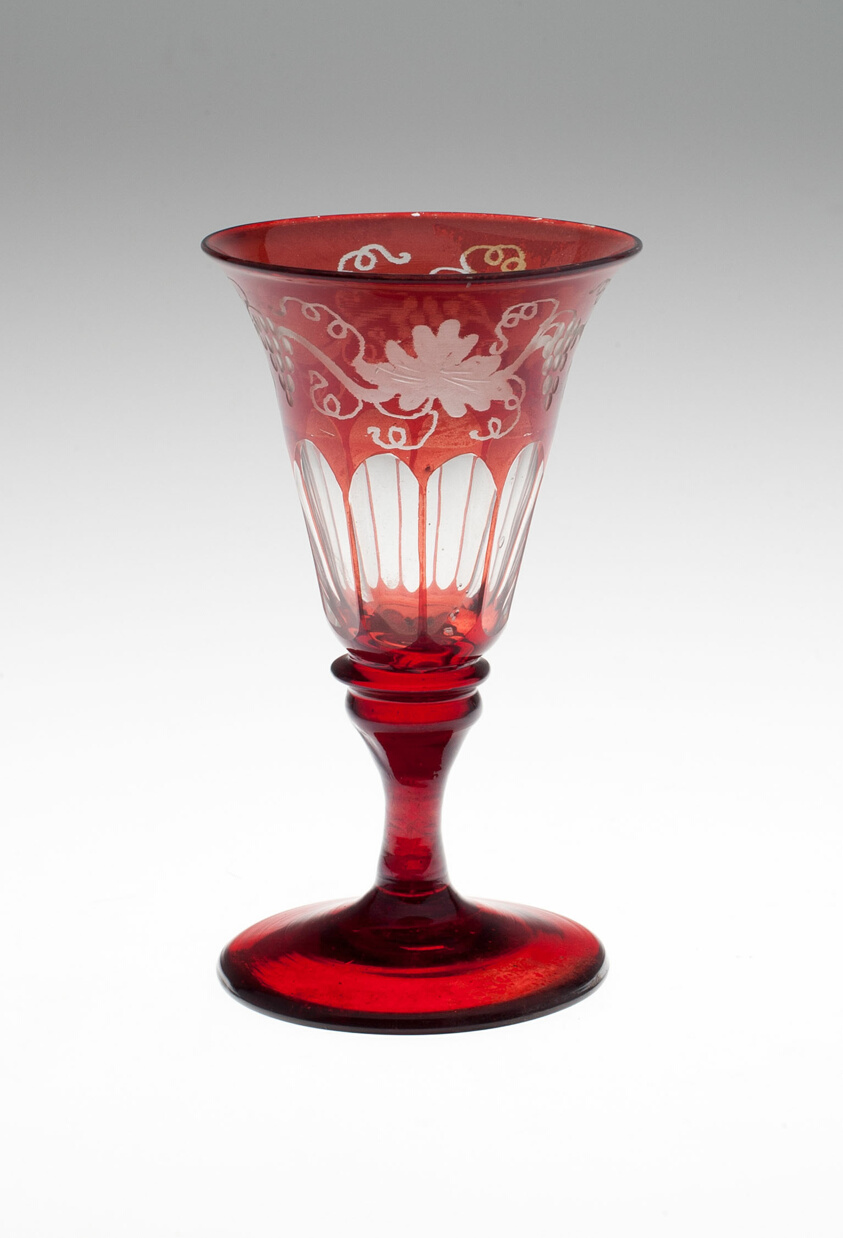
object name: Glass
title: Wine Glass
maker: Bohemia, Czech Republic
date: Mid to late 19th century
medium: Glass; blown, cut, stained red and engraved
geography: Bohemia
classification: drinking vessel; glass (object genre); glass